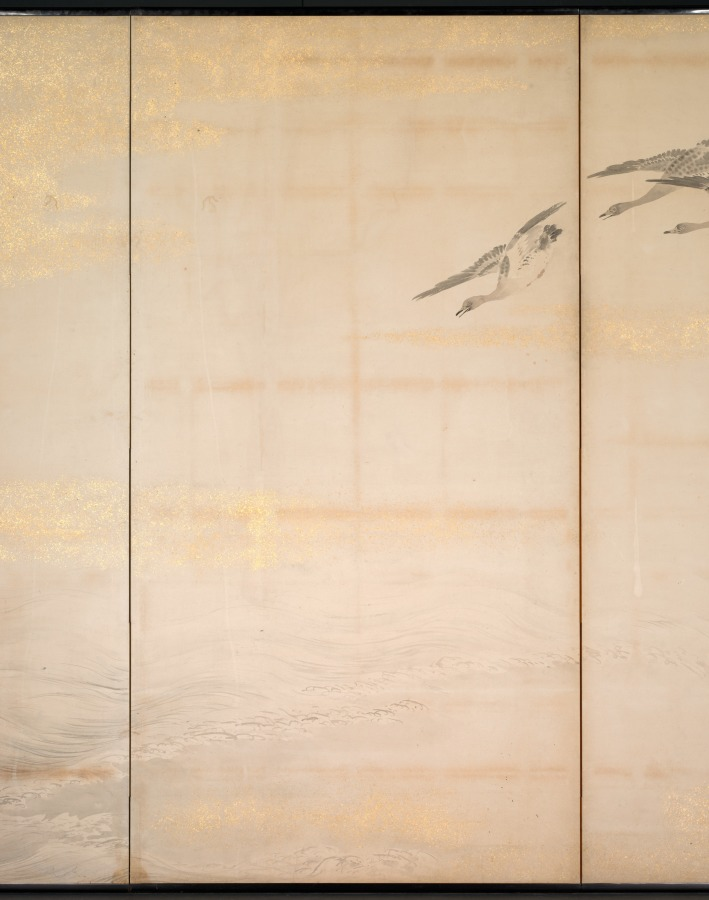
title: Geese, Reeds and Water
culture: Japan, Edo period (1615–1868)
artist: Yamamoto Baiitsu (Japanese, 1783–1856)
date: 1800s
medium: One of a pair of four-panel folding screens; ink, color, and cut gold foil on paper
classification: Painting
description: This byōbu composition differs from most in that it comprises two four-panel screens, rather than two six-panel units. Since the current mounting is modern, it is impossible to determine whether its present configuration represents its original design. Some panels may have been removed to help the screens better fit into a modern interior space. Baiitsu worked almost exclusively in monochromatic ink tones and favored classical Chinese painting themes.